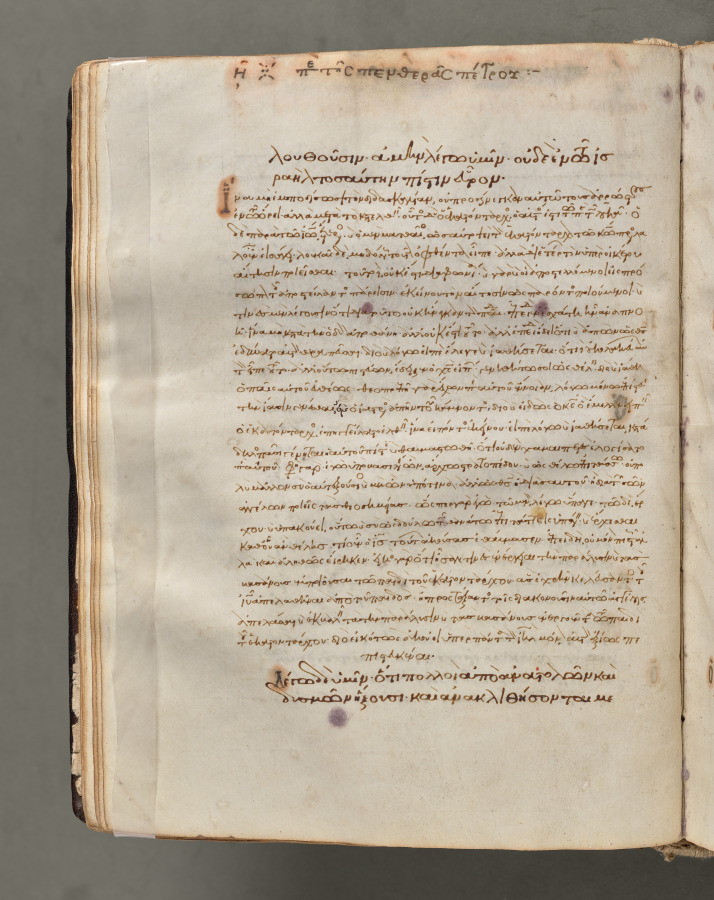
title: Text, folio 33 (verso), from a Gospel Book with Commentaries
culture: Byzantium, Constantinople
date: c. 1000–1100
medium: ink, tempera, and gold on vellum; leather binding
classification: Bound Volume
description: Each of the four gospels in this book opens on a page with brilliantly illuminated borders depicting the author of the text as well as birds—principally peacocks, symbols of the immortality of the soul—and fountains, representing the fountain of life and the salvation of the soul. This volume consists of 428 leaves with texts in Greek. Its level of sophistication suggests that it was probably written and decorated in a monastery in Constantinople.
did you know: Gospel Books were carried in procession through Byzantine churches.